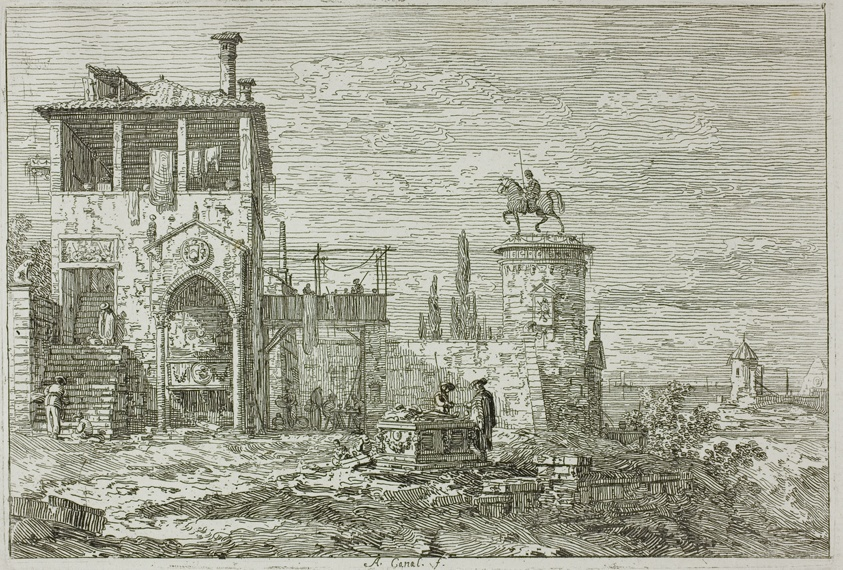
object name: Print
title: The Equestrian Monument, from Vedute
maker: Canaletto (Italian, 1697-1768)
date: 1735/44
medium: Etching in black on ivory laid paper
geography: Italy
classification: etching; print; prints and drawing